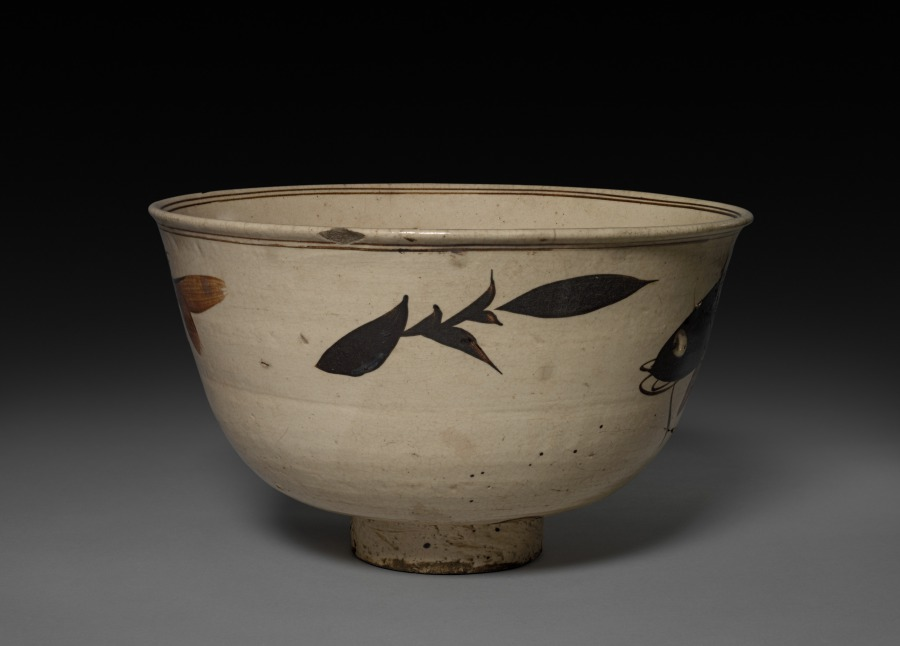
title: Bowl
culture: China, Ming dynasty (1368–1644)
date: 1368–1644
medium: stoneware, Cizhou ware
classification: Ceramic